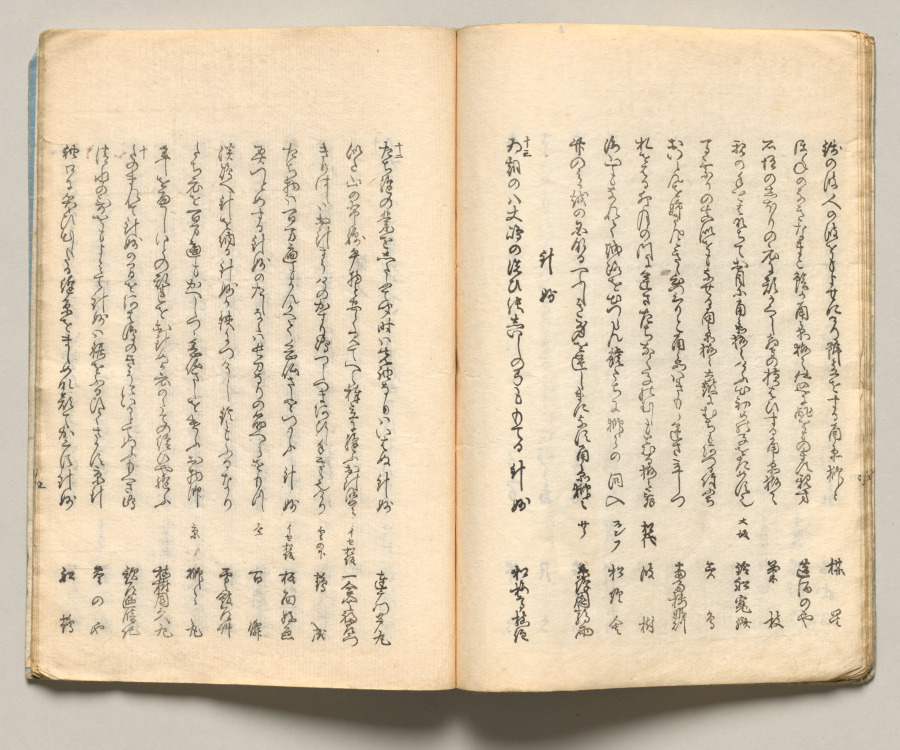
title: Spread Twelve from Volume Six of People of Japan in Light Verse (Kyōka)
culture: Japan, Edo period (1615–1868)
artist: Utagawa Hiroshige (Japanese, 1797–1858)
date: 1857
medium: Woodblock-printed book; ink and color on paper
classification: Bound Volume